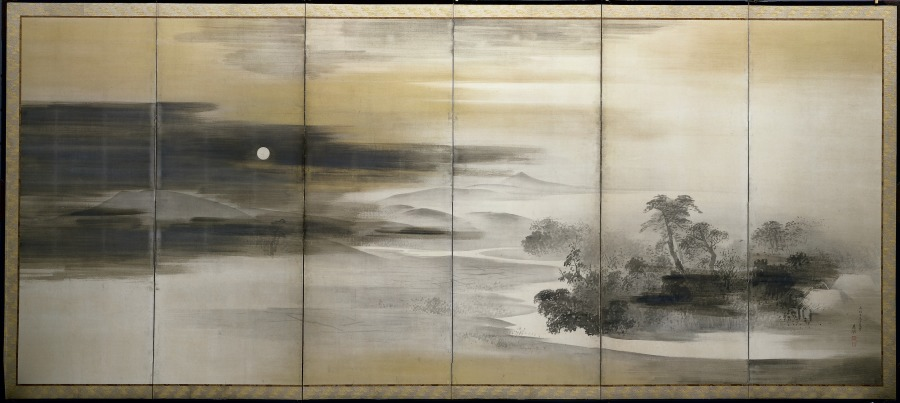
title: Summer Night; Winter Day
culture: Japan, Edo period (1615–1868)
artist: Maruyama Ōkyo (Japanese, 1733–1795)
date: 1784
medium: Pair of six-panel folding screens, ink, gold, and silver on paper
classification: Painting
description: Ōkyo painted these panoramas in the summer of 1784. Regarded as Kyoto's most important painting teacher and accomplished artist, he had studied Western painting techniques, "realistic" sketching from nature, and traditional Japanese style painting (yamato-e). The naturalistic quality of these scenes results from a blend of detailed observation of nature and a remote, even detached regard for man's place in the world.